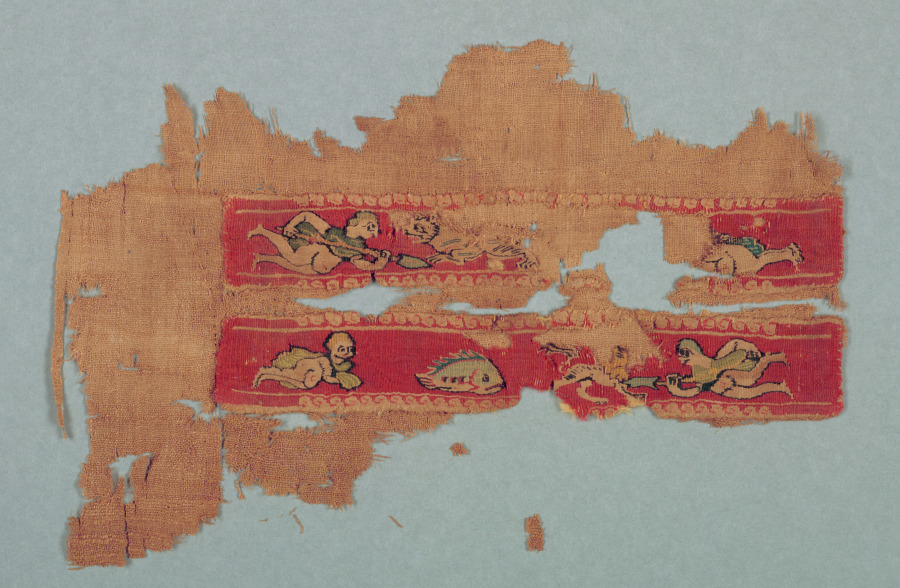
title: Fragment from a Child's Tunic: Sleeveband II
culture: Egypt, Umayyad period (661–750)?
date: 600s–700s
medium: Wool and linen: tabby weave, inwoven tapestry ornament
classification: Textile